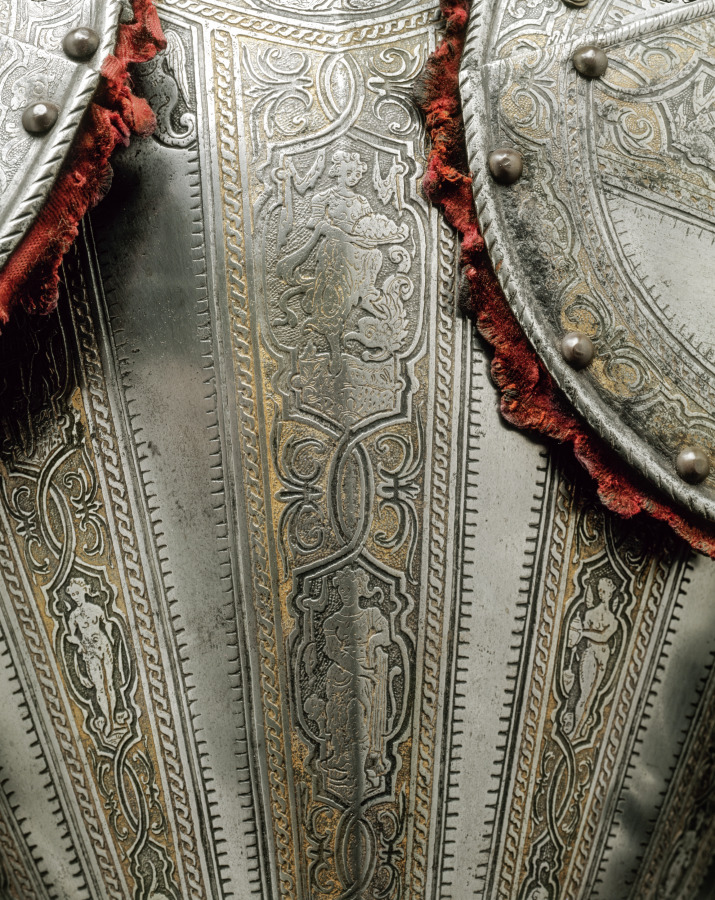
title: Half Armor for the Foot Tournament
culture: Italy, Milan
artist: Pompeo della Cesa (Italian, active 1572–93)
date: c. 1590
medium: etched and gilded steel, brass rivets, leather and velvet fittings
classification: Arms and Armor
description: This armor was designed for the foot tournament, an event that was separate from the equestrian jousts popularized during the Middle Ages and still favored among Renaissance aristocracies throughout Europe. Foot tournaments were commonly fought over a barrier that separated the combatants and gave protection to their legs, so a half-armor such as this one provided sufficient protection. The original owner of this suit would have worn it with colorful puffed and slashed britches and hose. The use of outlandish accessories, such as a large ostrich feather plume (a brass plume holder may be seen on the back of the helmet) and red velvet pickadils between the steel plates, provided additional splendor.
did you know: Pompeo della Cesa was the Armani or Gucci of the 1500s; everyone wanted to wear him.